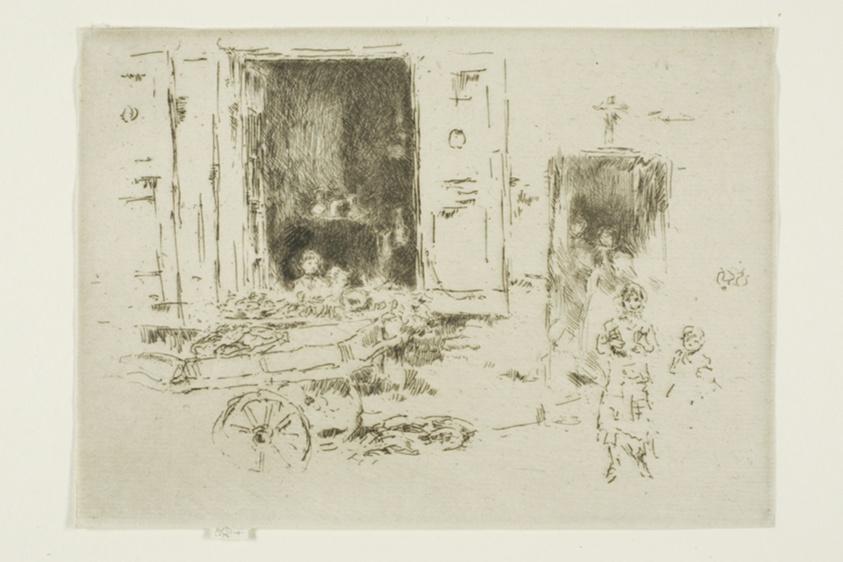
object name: Print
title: The Barrow - Quartier des Marolles, Brussels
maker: James McNeill Whistler (American, 1834-1903)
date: 1887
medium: Etching and drypoint with foul biting in black ink on ivory laid paper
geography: United States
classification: etching; foul biting; print; prints and drawing; drypoint; paper